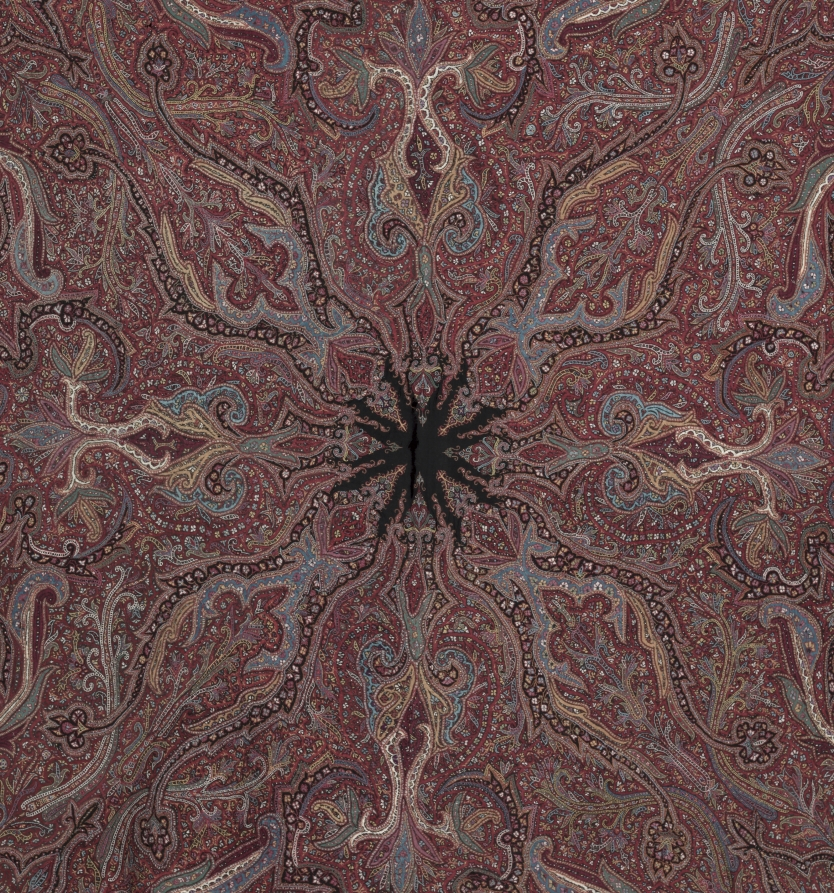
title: Shawl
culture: India, Kashmir, late 19th century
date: 1870s - 1880s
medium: embroidery, large pieced areas: wool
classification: Embroidery